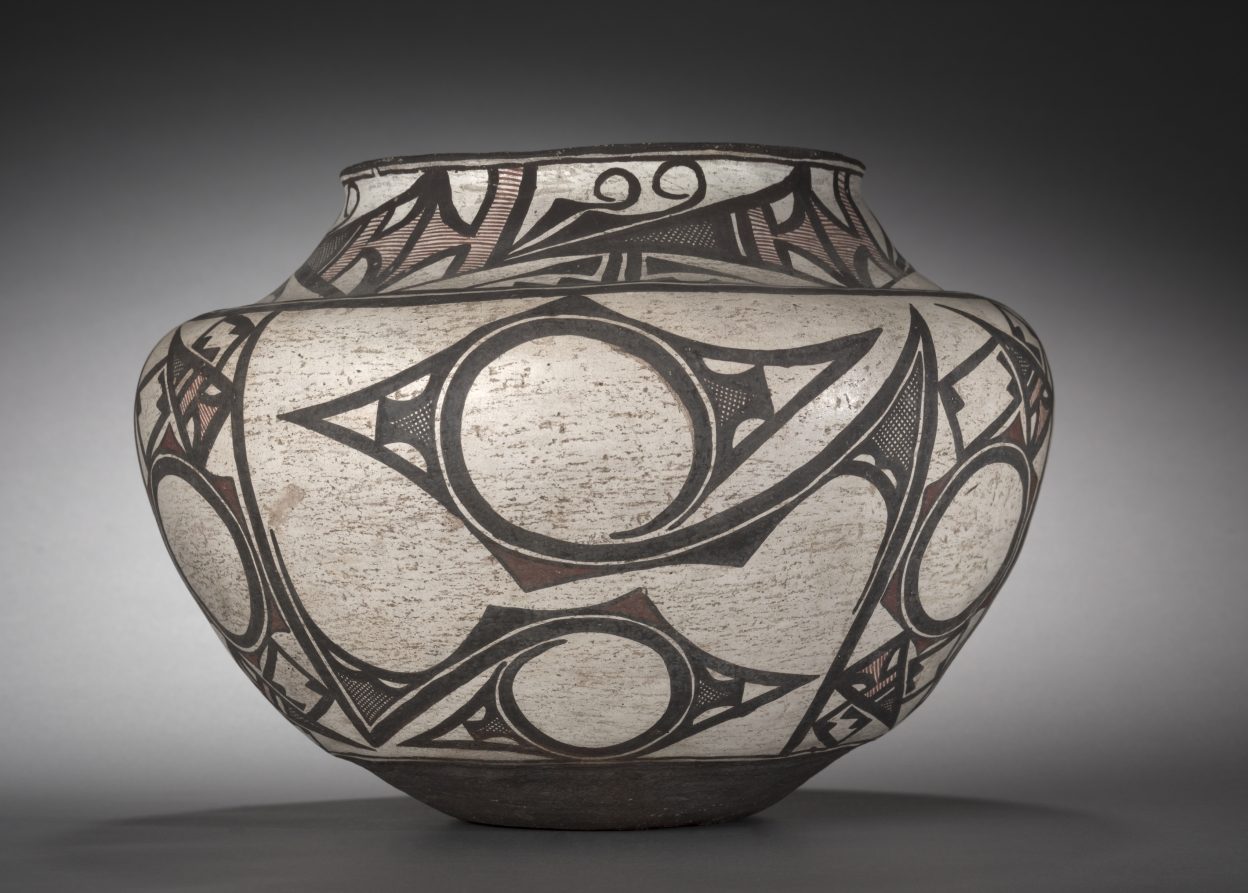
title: Water Jar (Olla)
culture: Native North America, Southwest, New Mexico, Zuni (A:shiwi) Pueblo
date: 1880s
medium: ceramic, slip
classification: Ceramic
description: The underside of this Zuni (A:shiwi) jar (olla), made by a woman to collect and store water in the 1800s, curves upward to allow the jar to be carried atop the head. Today, this traditional skill is celebrated by the Zuni Olla Maidens, a nationally known dance group that performs while balancing ollas on their heads. Ollas naturally keep water cool via evaporation through their porous walls, a valuable trait in the desert Southwest. Many Zuni say that water from an olla tastes better than water from a tap.